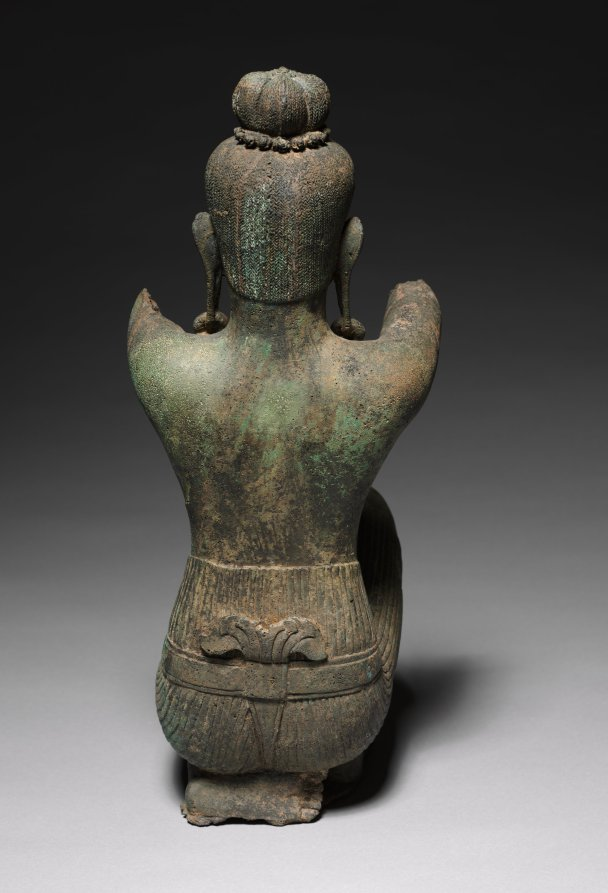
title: Kneeling Male Figure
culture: Cambodia, Angkor, Baphuon, Baphuon period, 1000s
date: 1010–80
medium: bronze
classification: Sculpture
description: The third eye in the forehead indicates that this figure identified himself with Shiva, but his kneeling stance with hands raised in a gesture of adoration indicates that he is a devotee of Shiva, who has taken on aspects of the god's physical appearance. The style of the lower garment with the low-slung belt is typical of work from the so-called Baphuon period of Khmer sculpture, like the stone standing image to the left. The eyes, eyebrows, moustache, and beard were once inlaid with silver.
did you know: This bronze figure was cast using the lost-wax (cire perdu) technique with the core armature inside.